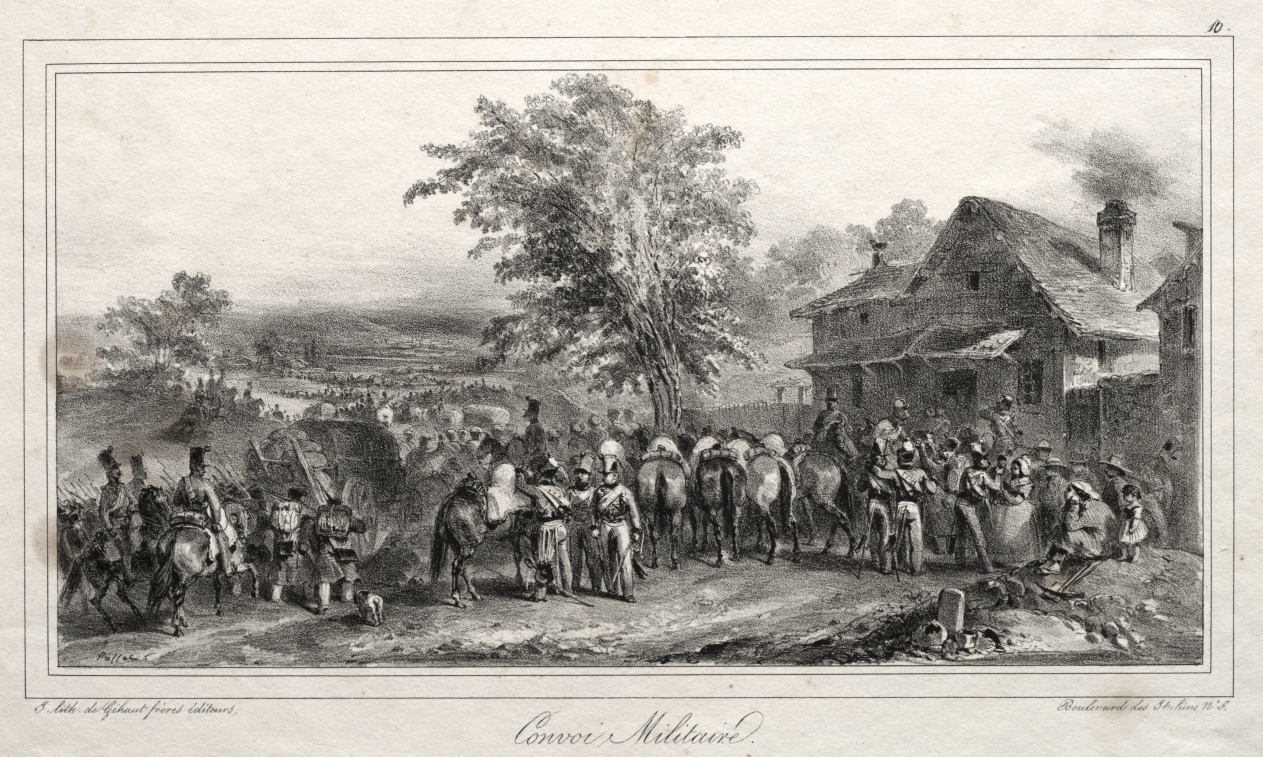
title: Album pour 1831: Convoi militaire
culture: France, 19th century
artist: Auguste Raffet (French, 1804–1860)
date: 1831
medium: lithograph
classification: Print